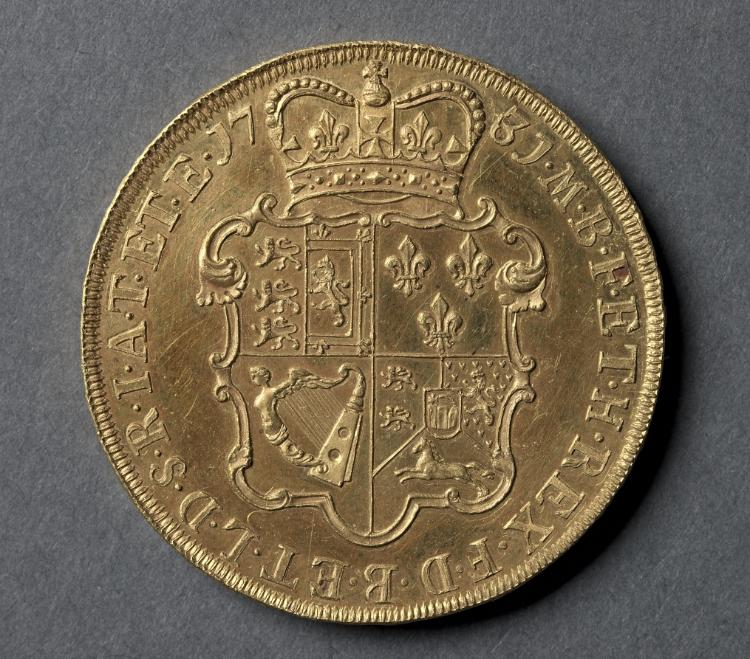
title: Five Guineas: Crowned and Garnished Shield of Arms (reverse)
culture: England, George II, 1727-1760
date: 1731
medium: gold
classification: Coins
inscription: M.B.F.E.T.H.REX.F.D.B.ET.L.D.S.R.I.A.T.ET.E.1731.